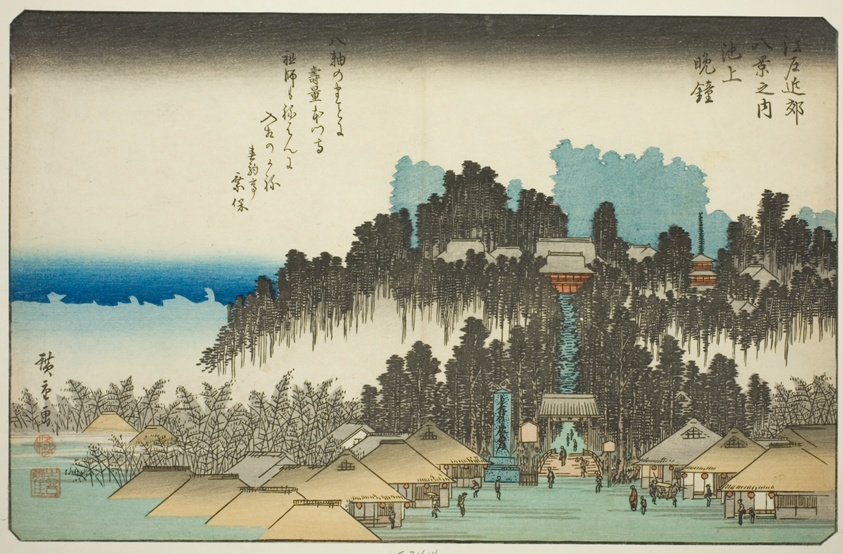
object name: Print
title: Evening Bell at Ikegami (Ikegami no bansho), from the series "Eight Views in the Environs of Edo (Edo kinko hakkei no uchi)"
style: Japanese (culture or style)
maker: Utagawa Hiroshige 歌川 広重; Japanese, 1797-1858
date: c. 1837/38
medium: Color woodblock print; oban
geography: Japan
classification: woodblock print; print; asian art